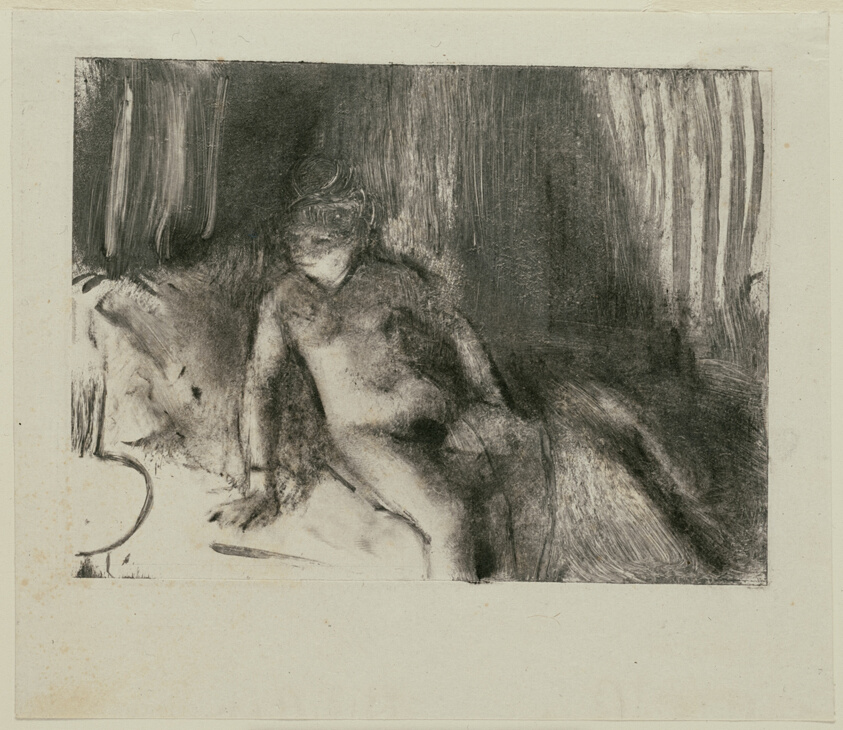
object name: Print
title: Waiting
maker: Edgar Degas; French, 1834-1917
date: c. 1879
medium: Monotype in blackish-brown ink on grayish-ivory china paper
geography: France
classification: monotype; print; prints and drawing; paper